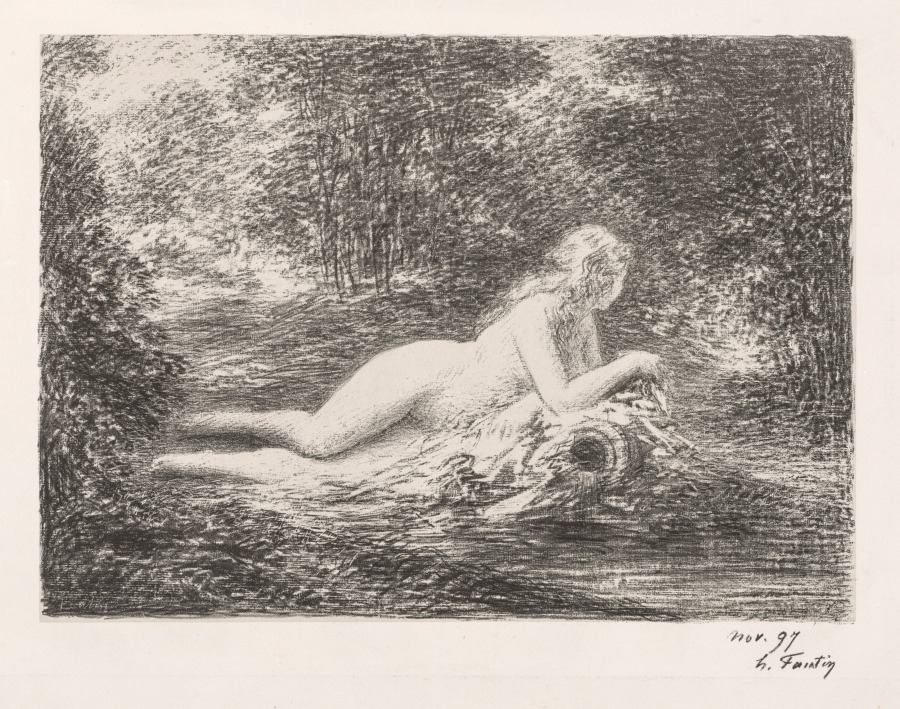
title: The Spring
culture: France, 19th century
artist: Henri Fantin-Latour (French, 1836–1904)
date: 1897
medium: lithograph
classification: Print